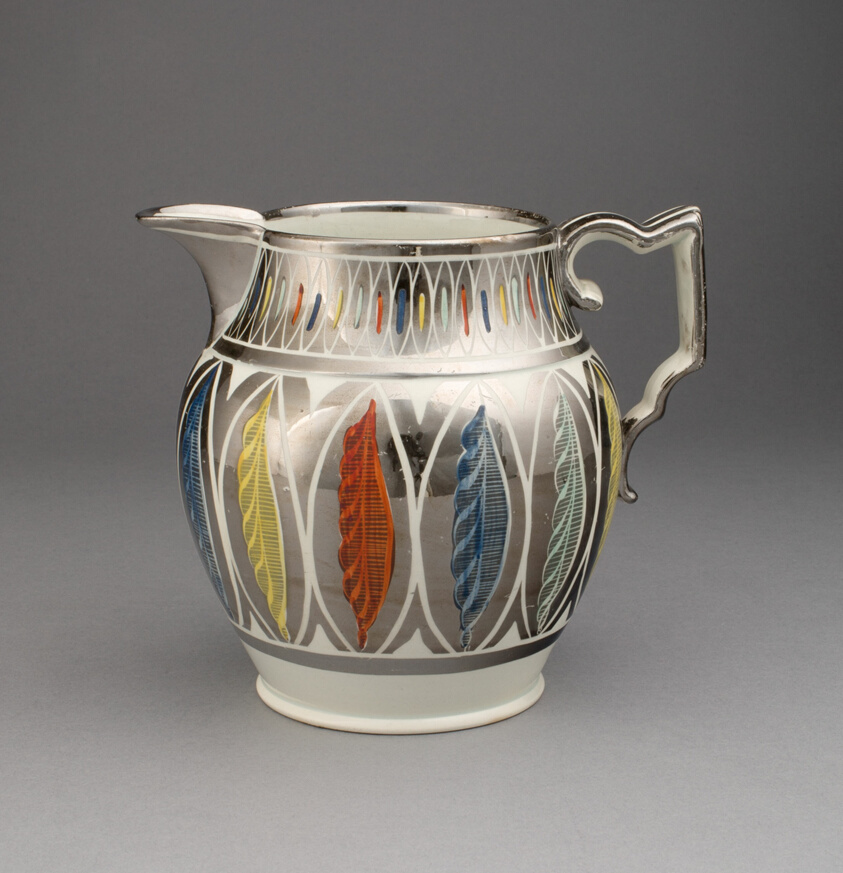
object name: Ceramics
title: Pitcher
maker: England, Staffordshire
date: 1810/20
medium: Lead-glazed earthenware with lustre decoration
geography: Staffordshire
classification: pitcher (vessel); earthenware; vessel; european decorative arts; ceramics